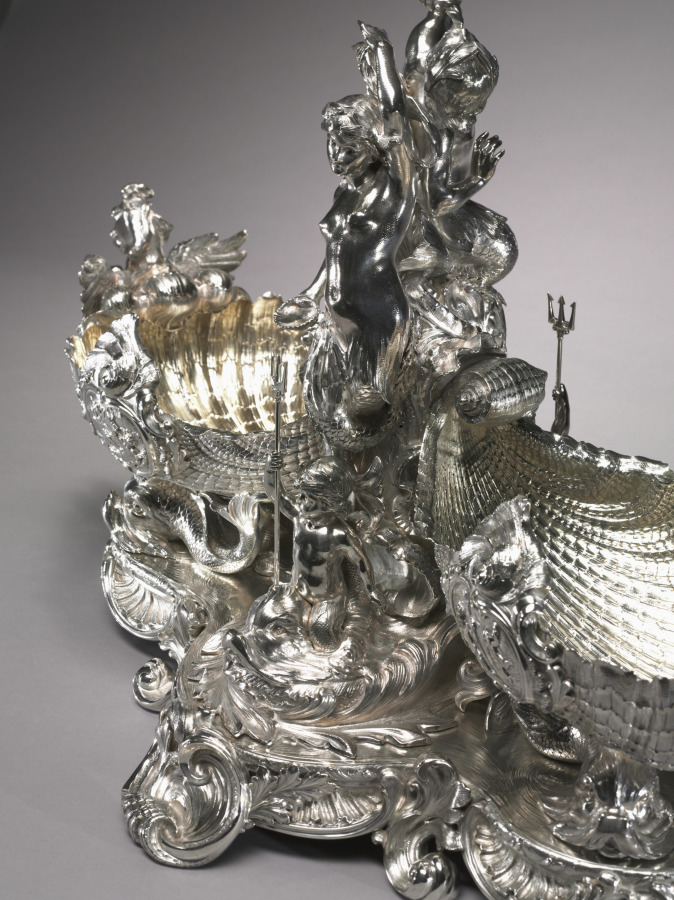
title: Centerpiece from the Nereid Service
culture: England, late 19th-early 20th century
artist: Goldsmith's & Silversmith's Company (British)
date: c. 1900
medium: silver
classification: Silver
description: Originally thought to have been made by the early 19th-century London silversmith Paul Storr because it had been marked with spurious Storr hallmarks, more recent scholarship has revealed that this service, representing the triumph of Great Britain on the high seas through the allegorical images of Grecian nymphs (nereids), was actually made to display at the 1900 world's fair in Paris. Such nationalistic fervor permeated design at the turn of the 20th century, especially in the years leading up to the First World War, when national pride was brought to its heels in Europe through a devastating conflict.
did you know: This centerpiece is actually the product of many hands since the Goldsmiths' and Silversmiths' Company operated as a cooperative of silversmiths who sold their work through the company.